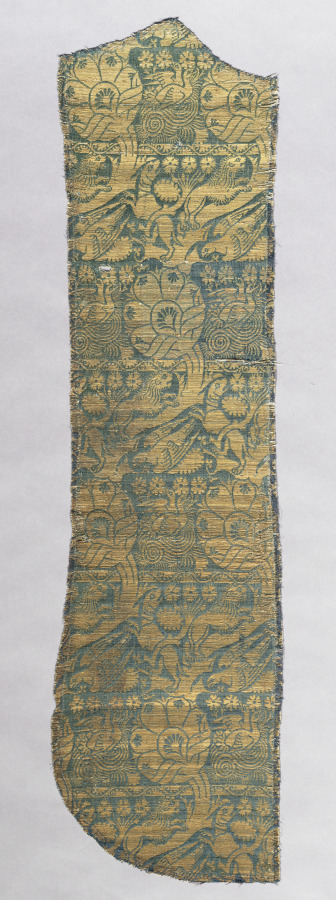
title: Chasuble Fragment with Realistic Animals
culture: Italy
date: c. 1420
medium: Silk, gold thread; lampas weave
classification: Textile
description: Around 1400 an emerging interest in the bucolic world of nature encouraged a new trend among textile designers, as seen in the lions, hawks, dogs, and ducks on this luxury silk fragment. The continual influence of Chinese asymmetry, however, is evident in the prominent undulating palmette trees, enlarged from sinuous vines frequently seen in Italian silks and velvets from this period.